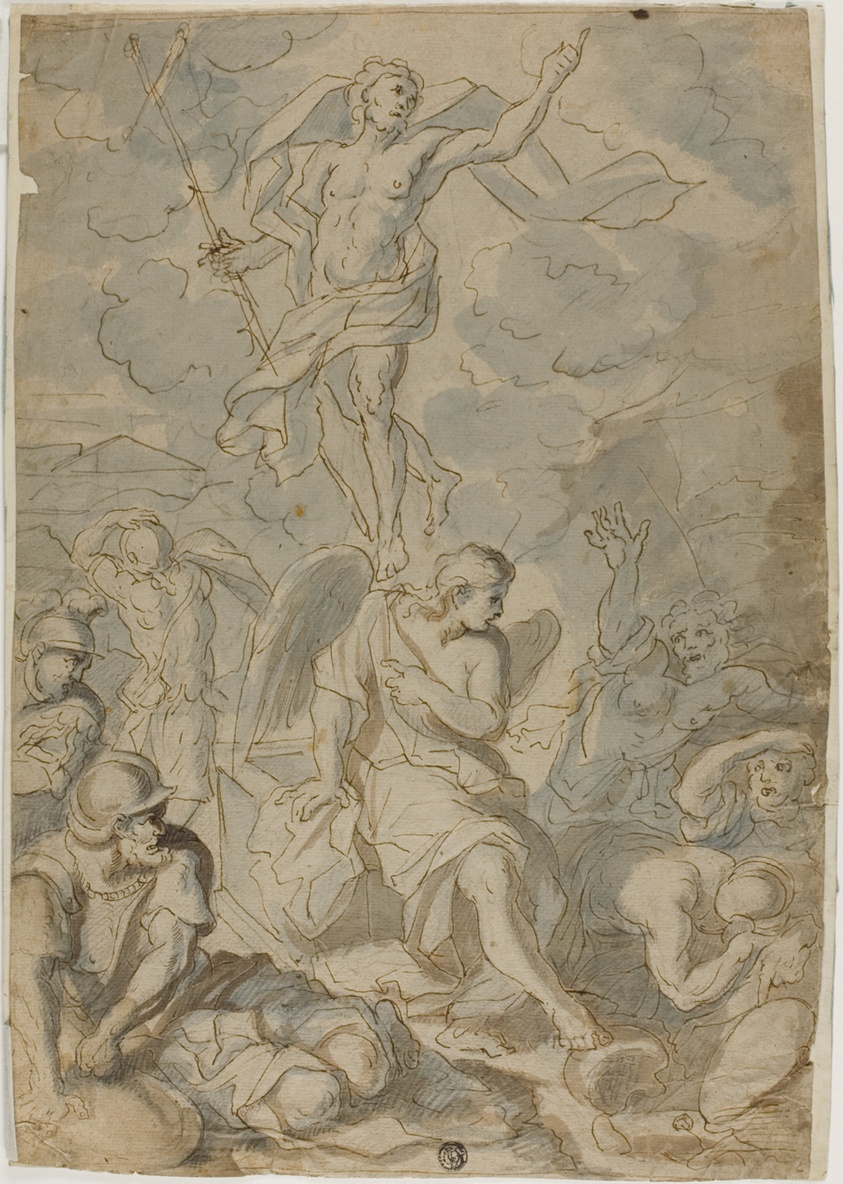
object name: Drawing and Watercolor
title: Resurrection of Christ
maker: Style of Charles Le Brun (French, 1619-1690)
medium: Pen and brown ink with brush and blue and brown wash, over black chalk, on tan laid paper, tipped onto gray laid paper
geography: France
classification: pen and ink drawings; drawings (visual works); prints and drawing